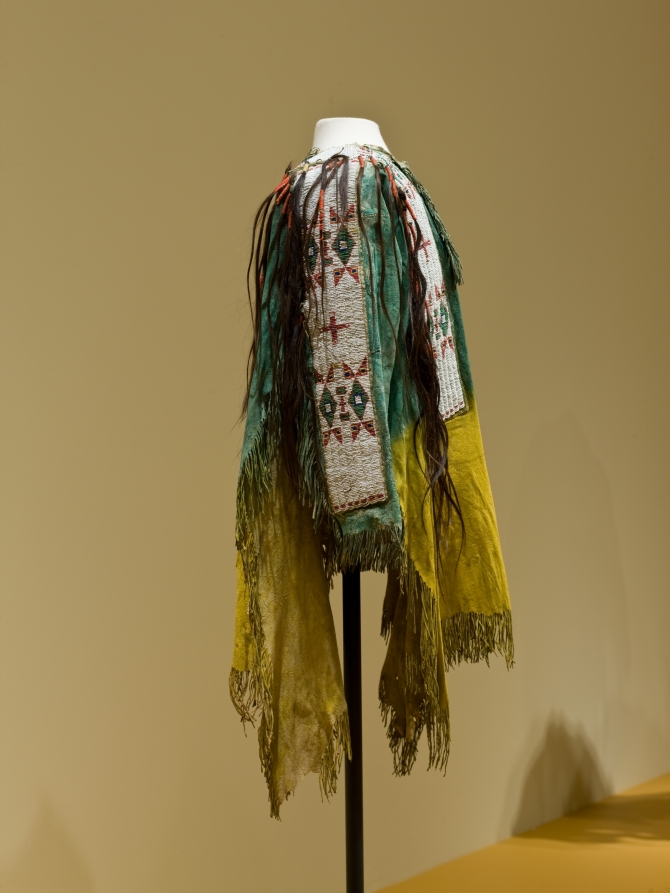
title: Hide Shirt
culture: America, Native North American, Central Plains, Lakota Sioux, 19th century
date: c. 1890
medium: hide, pigment, glass beads, human hair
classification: Textile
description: Traditionally, only Lakota (Sioux) head chiefs had the right to wear painted shirts, an honor they earned through sacrifice and bravery but lost by failing in their responsibilities. By the time this example was created, European Americans had confined the Lakota to reservations, and painted shirts had become the privilege of battle veterans rather than of active warriors. Family members probably donated the locks of hair, each representing a war exploit.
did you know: Only Lakota (Sioux) chiefs had the right to wear painted shirts, an honor they earned through bravery.